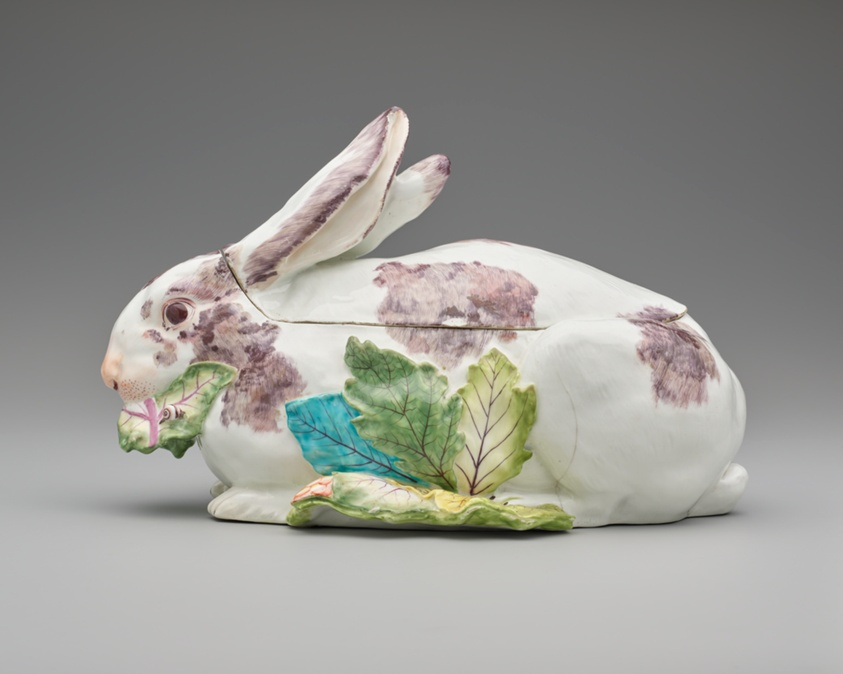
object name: Ceramics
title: Tureen in the form of a Rabbit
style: Rococo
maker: Chelsea Porcelain Manufactory; English, c. 1745–1784; London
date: 1755–56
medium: Soft-paste porcelain and polychrome enamels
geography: Chelsea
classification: tableware; porcelain; european decorative arts; ceramics